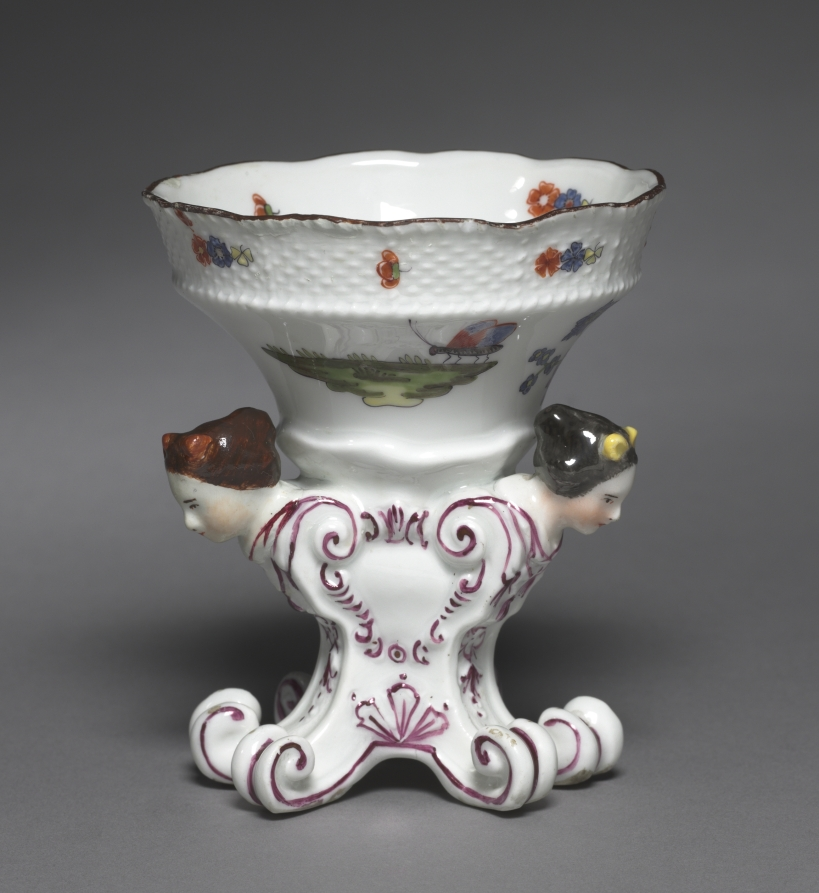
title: Salt Cellar from the Sulkowsky Service (1 of 2)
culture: Germany, Meissen, 18th century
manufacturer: Meissen Porcelain Factory (German, est. c. 1710)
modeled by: Johann Friedrich Eberlein (German, 1696–1749)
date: c. 1736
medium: hard-paste porcelain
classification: Ceramic